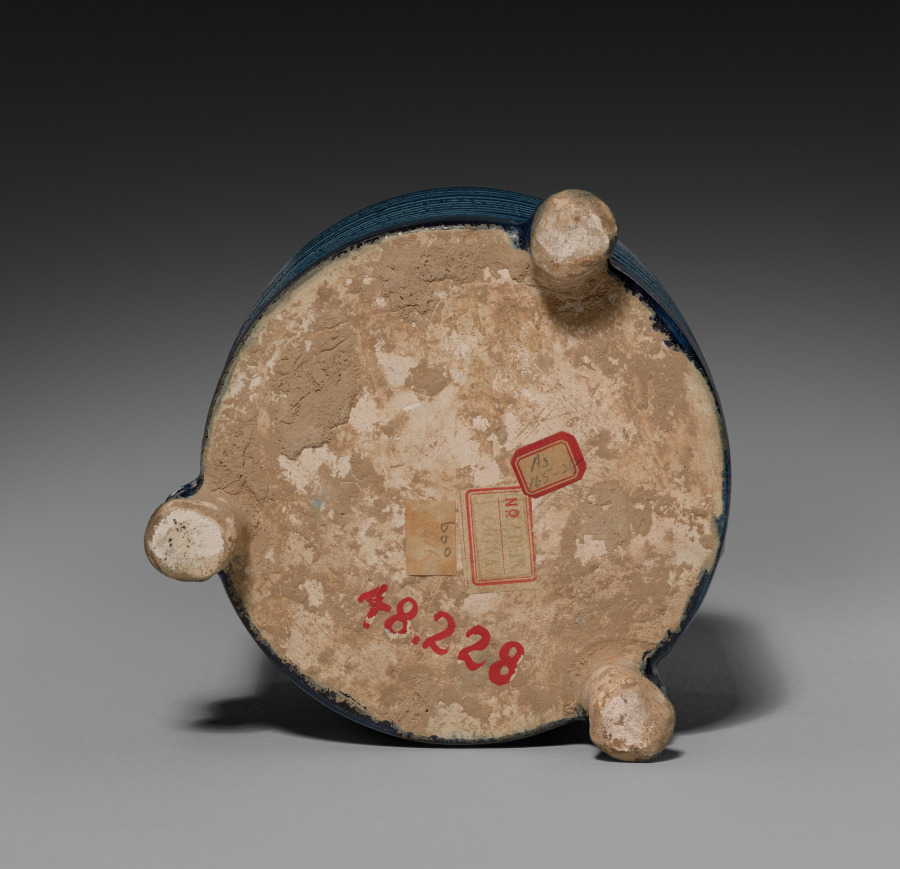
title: Covered Jar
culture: China, Tang dynasty (618-907)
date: early 700s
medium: glazed earthenware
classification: Ceramic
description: This covered cylindrical jar with three animal feet is lavishly covered with a cobalt blue glaze in the exterior and an amber glaze in the interior. Of the colored lead glazes of sancai (three-color) ware, blue was preeminent and precious. Imported cobalt from Persia (Iran, Afghanistan) was used as a glaze colorant that yields a rich, brilliant blue of considerable splendor.